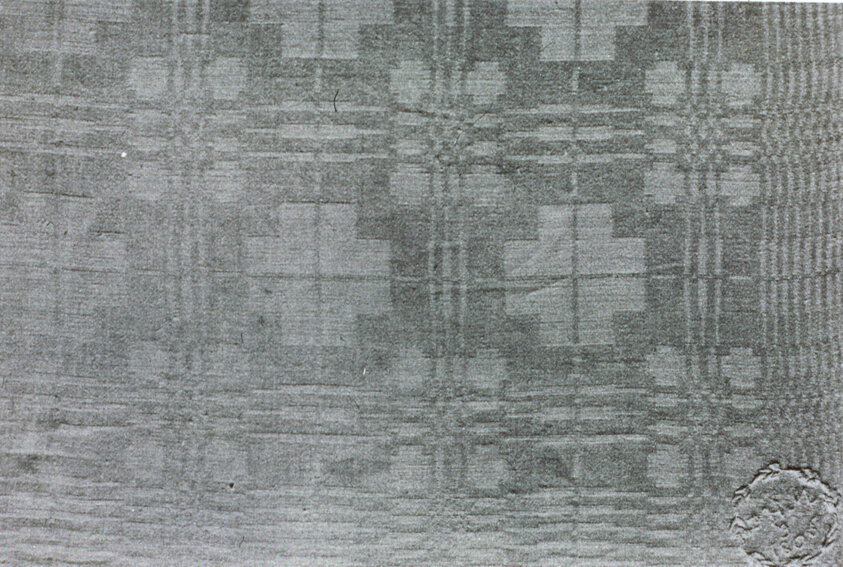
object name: Textile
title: Napkin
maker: Germany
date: 18th century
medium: Linen, satin weave self-patterned by reversing of faces (satin damask); initials embroidered with cotton and linen in back, chain, satin, and single satin stitches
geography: Germany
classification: textile; weaving; coverlet